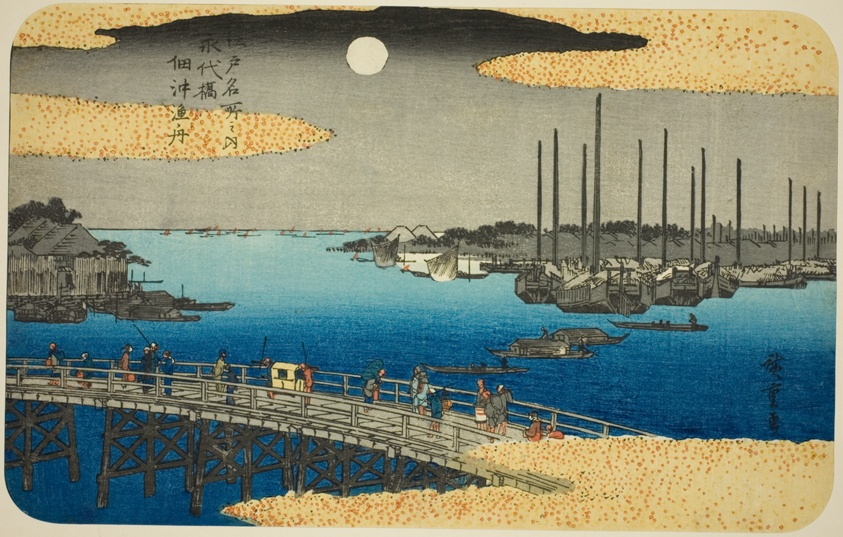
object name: Print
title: Fishing Boats near Eitai Bridge in Tsukuda Bay (Eitaibashi Tsukuda oki isaribune), from the series "Famous Places in Edo (Edo meisho no uchi)"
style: Japanese (culture or style)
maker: Utagawa Hiroshige 歌川 広重; Japanese, 1797-1858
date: c. 1832/34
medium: Color woodblock print; oban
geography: Japan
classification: woodblock print; print; asian art